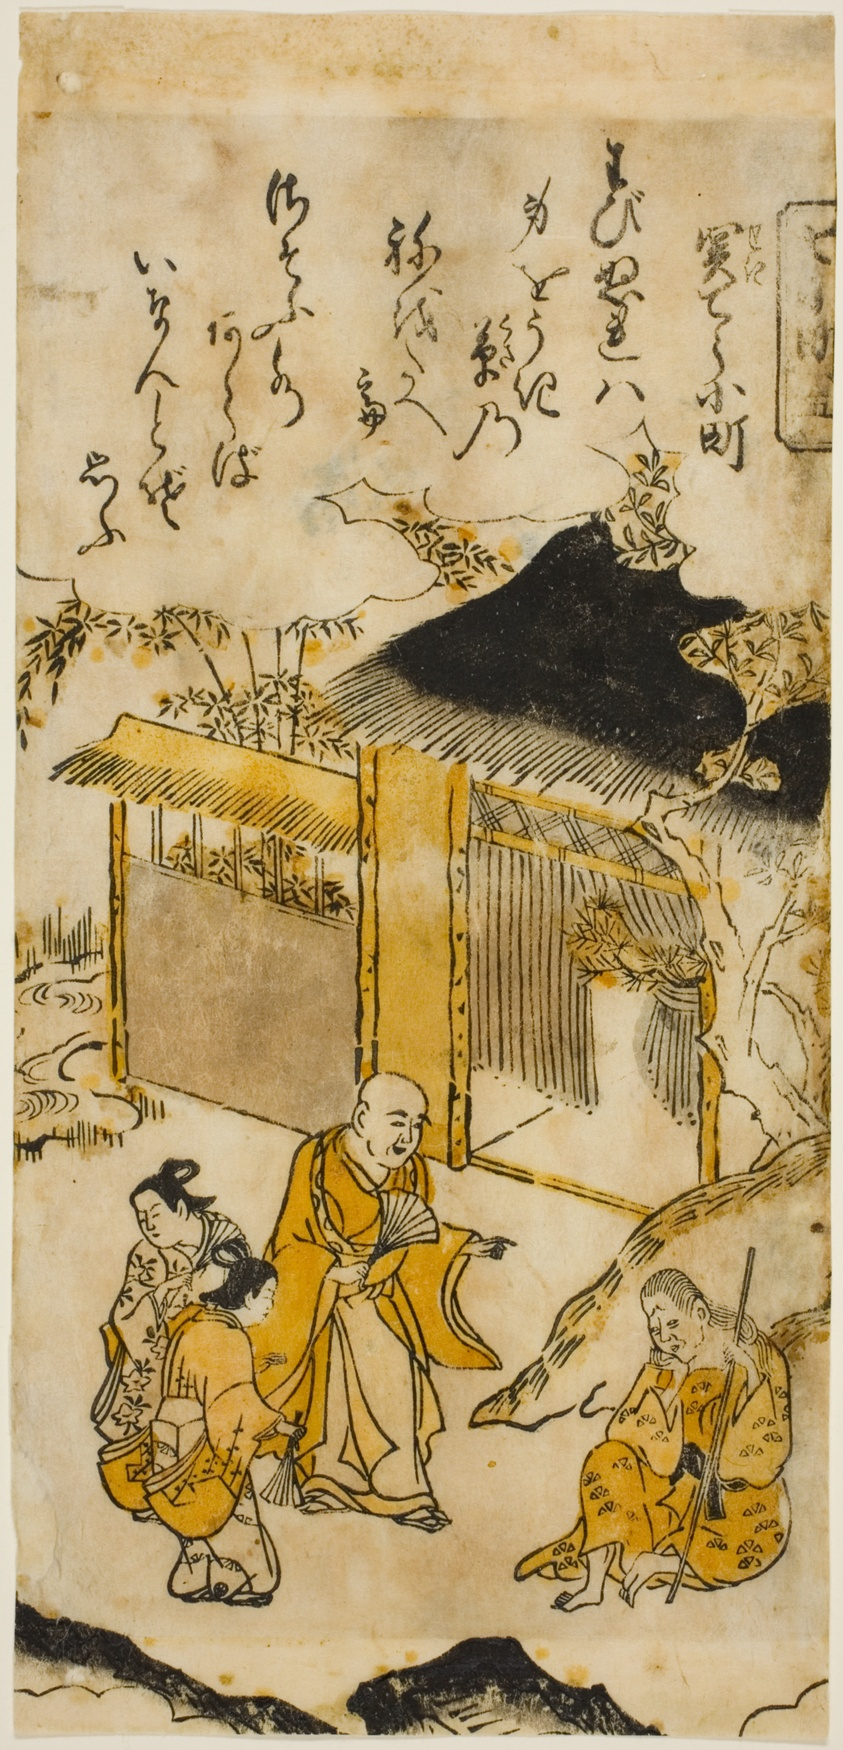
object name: Print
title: Komachi at Sekidera (Sekidera Komachi), No. 5 from the series "Seven Komachi (Nana Komachi)"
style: Japanese (culture or style)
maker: Nishimura Shigenaga (Japanese, 1697 (?)-1756)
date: c. 1716/36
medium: Hand-colored woodblock print; hosoban, beni-e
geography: Japan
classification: woodblock print; print; asian art